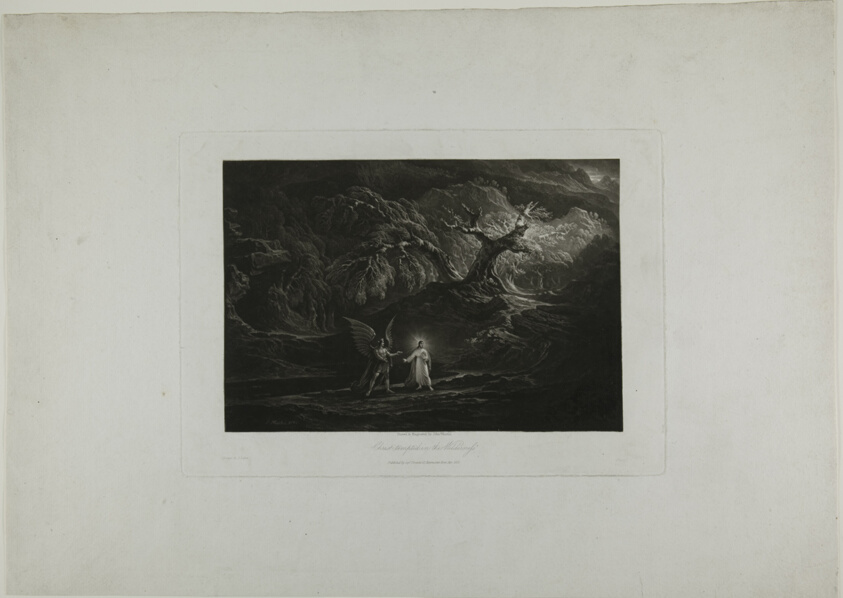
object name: Print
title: Christ Tempted in the Wilderness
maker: John Martin (English, 1789-1854)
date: 1824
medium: Mezzotint, with etching on cream laid paper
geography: England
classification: mezzotint; print; prints and drawing